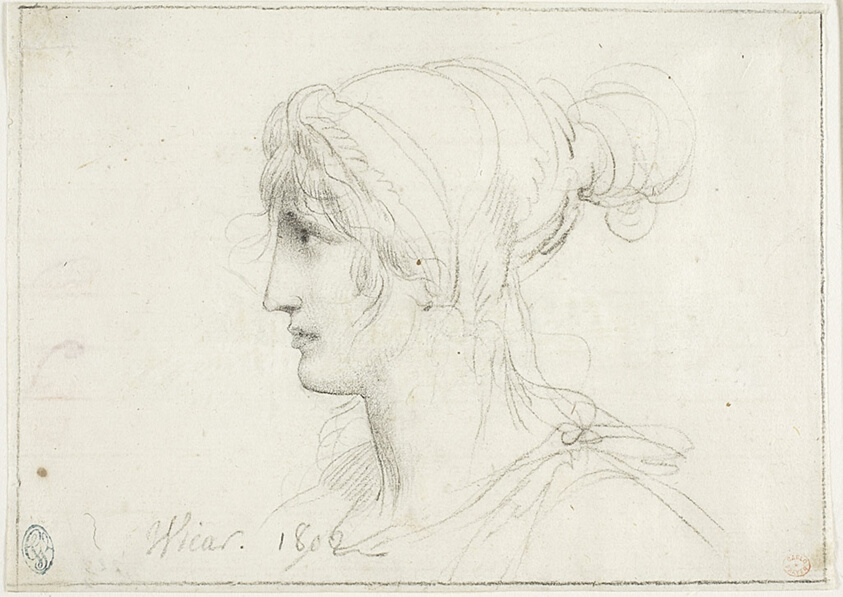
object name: Drawing and Watercolor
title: Profile of a Woman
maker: Jean Baptiste Joseph Wicar (French, 1762-1834)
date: 1802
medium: Black chalk, on ivory laid writing paper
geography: France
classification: chalk; drawings (visual works); prints and drawing